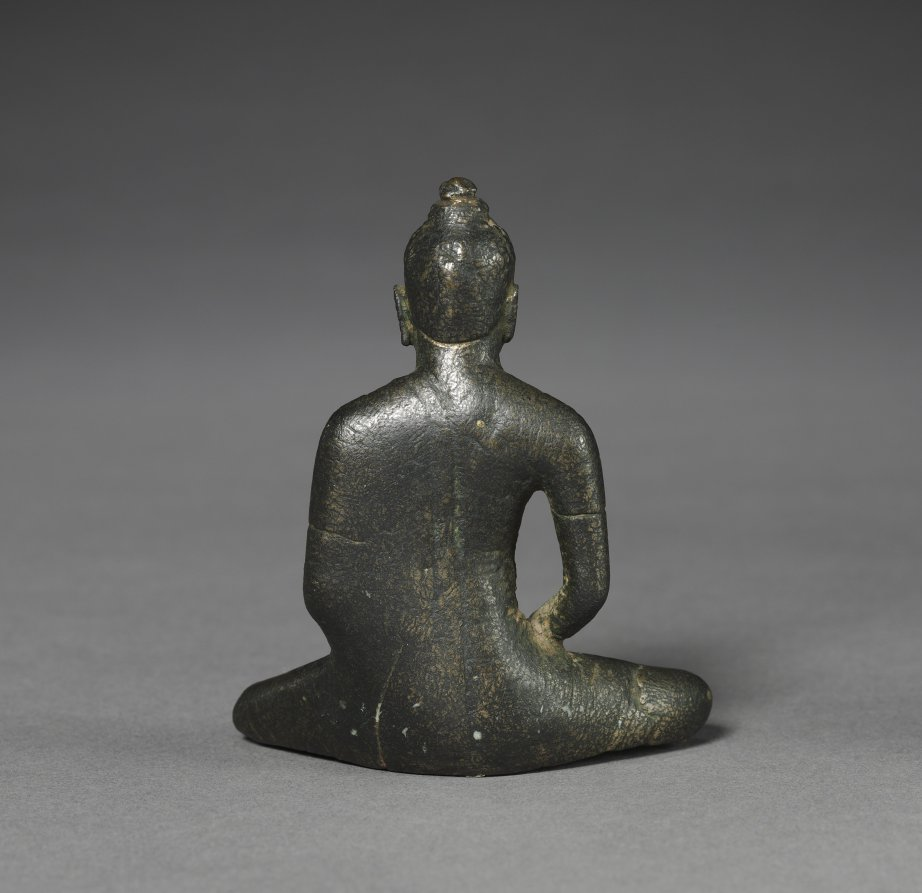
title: Sakyamuni Buddha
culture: Ceylon, Anuradhapura style, 7th-8th Century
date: 600s-700s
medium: bronze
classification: Sculpture